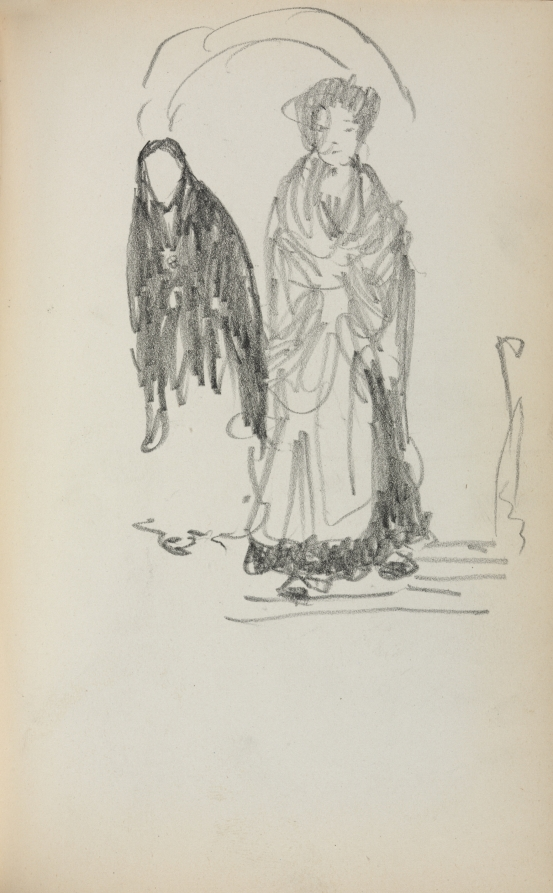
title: Italian Sketchbook: Two Standing Women (page 123)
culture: America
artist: Maurice Prendergast (American, born Newfoundland [now Canada], 1858–1924)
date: 1898–1899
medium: pencil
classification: Bound Volume